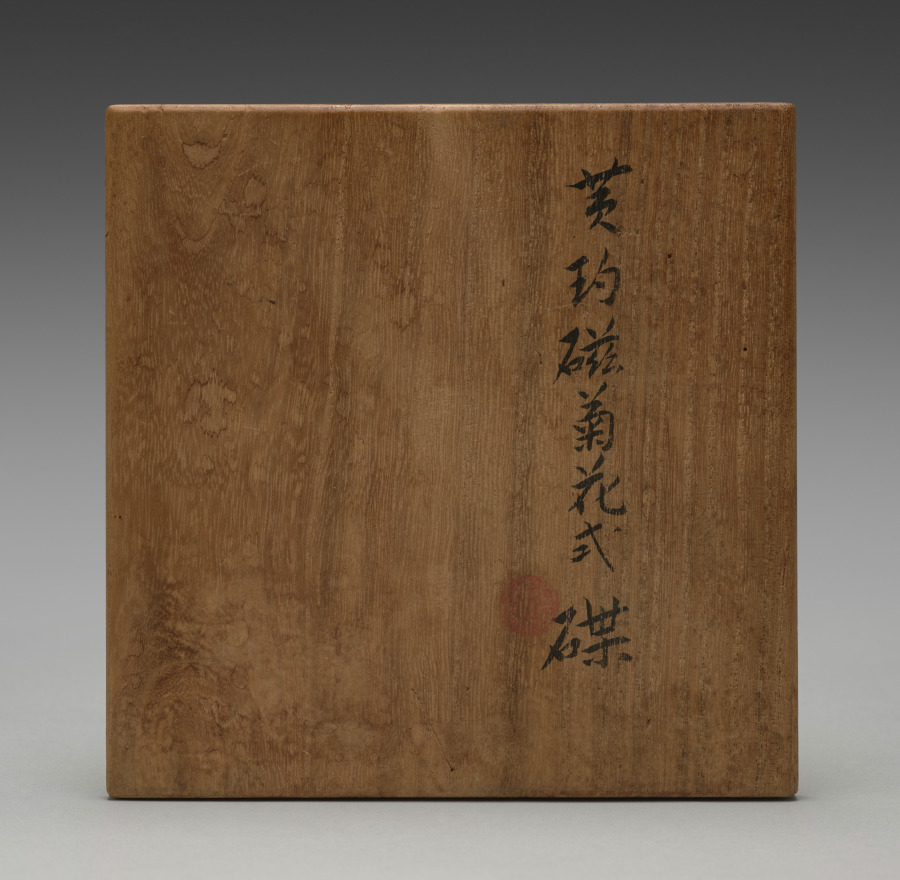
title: Chrysanthemum-Shaped Dish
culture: Japan, Taishō period (1912–26)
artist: Seifū Yohei IV (Japanese, 1872–1951)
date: 1914–46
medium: Porcelain with yellow glaze and molded decoration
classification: Ceramic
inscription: 清風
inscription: 清風造 【印】 清風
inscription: 【印】 清風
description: Like his father, Yohei IV also produced works with red or yellow monochrome glazes. His yellow-glazed works include this sweets bowl molded into the shape of a chrysanthemum, a set of five drinking cups CMA 2022.217, and a pair of sake pourers CMA 2022.216.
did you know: Seifū Yohei IV won a gold medal at the 1915 Panama-Pacific International Exposition in San Francisco for his ceramics.